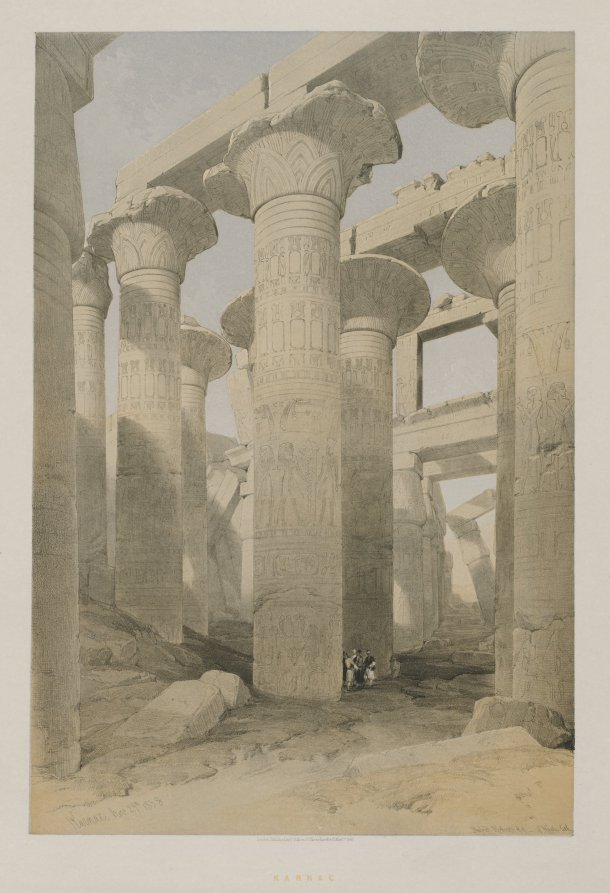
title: Egypt and Nubia, Volume II: Karnac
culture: England, 19th century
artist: Louis Haghe (British, 1806–1885)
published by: F. G. Moon, 20 Threadneedle Street, London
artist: after David Roberts (Scottish, 1796–1864)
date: 1847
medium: color lithograph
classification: Print